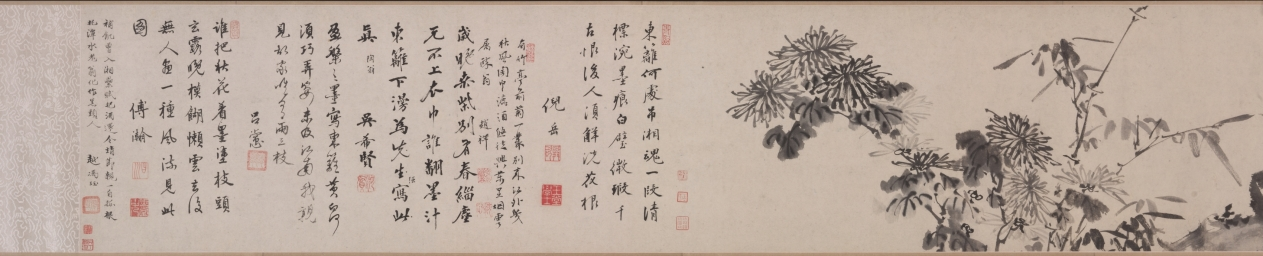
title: Chrysanthemums and Cabbage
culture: China, Ming dynasty (1368–1644)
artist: Tao Cheng (Chinese, active c. 1471–after 1502)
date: c. 1486 or before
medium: handscroll, ink and slight color on paper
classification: Painting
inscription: Artist's seal at beginning of painting: Yun hu 雲湖. Title by Wang Wenzhi 王文治 (1730–1802), date 1756. 2 seals of Wang Wenzhi 王文治 (1730-1802); 3 seals of Ku Yün (n. d.)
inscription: Section A (Chrysanthemums): 1 poem and 1 seal of Zhang Yuanzhen 張元禎 (1437–1507) - Jinshi, 1461; 1 poems and 3 seals of Ni Yue 倪岳 (1444–1501) - Jinshi, 1464; 1 poems and 2 seals of Zhao Xiang 趙祥 (life dates unknown) - Jinshi, 1469; 1 poems and 1 seals of Wu Xixian 吳希賢 (1437–1489) - Jinshi, 1464; 1 poems and 1 seals of Lü Chang 呂㦂 (1449–1511) - Juren, 1471; 1 poems and 3 seals of Fu Han 傅瀚 (1435–1502) - Jinshi, 1464; 1 poems and 1 seals of Feng Jue 馮珏 (life dates unknown) - Jinshi, 1478.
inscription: Chrysanthemums section, poem 1, by Zhang Yuanzhen 張元禎 (1437–1507): Several bushes of chrysanthemums grow in front of the Five-Willow Cottage,/ The yellow ones are really yellow and the white ones white./ This affable and decent fellow, young in years and unsophisticated,/ Has snapped one of the branches to dip in ink. (The Five-Willows Cottage was the home of the poet Tao Qian 陶潛 (Tao Yuanming 陶淵明, AD 365-427).) Chrysanthemums section, poem 2, by Ni Yue 倪岳 (1444–1501): Where at the Eastern Fence can you grieve for the Soul of the Xiang River?/ A man of upright character is mourned within the traces of ink./ White jade with a slight flaw would be a grievance forever,/ Later men should understand why even the roots of the flowers are washed. (Eastern Fence refers again to the poet Tao Qian 陶潛, while the Soul of the Hsiang River refers to the poet Qu Yuan 屈原 (c. 340–278 BC).) Chrysanthemums section, poem 3, by Zhao Xiang 趙祥 (life dates unknown): A clump of chrysanthemum grows in front of the bamboo pavilion,/ The winds of many autumns have blown since we parted beyond the river./ Straining wine through the official's cap of Tao [Qian] to prolong autumn's pleasures,/ The mists and clouds of ten thousand miles belong to the intoxicated. Chrysanthemums section, poem 4, by Wu Xixian 吳希賢 (1437–1489): It is a different spring if mulberry is planted during the latter part of the year,/ The dust of the world originally did not drop on clothing./ Who spills out ink under the Eastern Fence/ And paints so freely this portrait of chrysanthemums for the venerable Sir Tao? Chrysanthemums section, poem 5, by Lü Chang 呂㦂 (1449–1511): This full tray of ink for painting [flowers] at the Eastern Fence;/ Their whiteness or yellowness is not essential in capturing their beauty./ I don't have to go to Jiangnan to see them myself./ At my old house grow two or three branches. Chrysanthemums section, poem 6, by Fu Han 傅瀚 (1435–1502): Who daubed autumn flowers with ink/ As if they were dark dew on a branch tip only vaguely seen at evening?/ After the lazy clouds disperse, no one paints;/ A certain unconventionality pervades this painting. Chrysanthemums section, poem 7, by Feng Jue 馮珏 (life dates unknown): To satisfy his hunger, [the chrysanthemums] have at times entered the poetry of Qu Yuan;/ Taking up the wine cup, it felt close to Tao Qian./ [With them I am like] a lonely root sustained by deep water/ Or an old man to whose hair the color of youth returns.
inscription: Section B (Cabbage): 1 poem and 1 seal of Cai Qi 蔡圻 (life dates unknown) - degree information not known; 1 poems and 3 seals of Ni Yue 倪岳 (1444–1501) - Jinshi, 1464; 1 poem and 3 seals of Jiao Fang 焦芳 (1436–1517) - Jinshi, 1464; 1 poem and 3 seals of Li Dongyang 李東陽 (1447–1516) - Jinshi, 1464; 1 poems and 1 seals of Wu Xixian, signed “Xixian” 吳希賢 - Jinshi, 1464; 1 poems and 3 seals of Fu Han 傅瀚 (1435–1502) - Jinshi, 1464; 1 poems and 1 seals of Lü Chang 呂㦂 (1449–1511) - Juren, 1471; 1 poems and 2 seals of Zhao Xiang 趙祥 (life dates unknown) - Jinshi, 1469; 1 poems and 1 seals of Feng Jue 馮珏 (life dates unknown) - Jinshi, 1478.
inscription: Cabbage section, poem 1, by Cai Qi 蔡圻 (life dates unknown): The ink splashes are fresh from a frosty brush dipped in pond water;/ I can visualize that time when Yunhu 雲湖 [Tao Cheng] first showed his talents./ I lament the places where I scribbled before,/ Who would open them to inscribe a poem? (The first line is an allusion to the famous Jin dynasty calligrapher Wang Xizhi 王羲之 (AD 303-361), who practiced calligraphy so diligently at the edge of a pond that the water turned black with ink.) Cabbage section, poem 2, by Ni Yue 倪岳 (1444–1501): After rain the vegetables begin to grow;/ How are the colors of the masses lately!/ Once you get used to them, the tastiest parts are the ends of the roots;/ I don't know if they can be used for "seasoning soup." ("Seasoning soup" is an allusion to the statesmanship of a chief minister.) Cabbage section, poem 3, by Jiao Fang 焦芳 (1436–1517): This crop of purple stalks and green leaves is late and irregular;/ Now the rainy season is over for the Eastern Garden./ All the nobles nowadays dine on meat;/ Who of them knows the flavor of this [cabbage]. Cabbage section, poem 4, by Li Dongyang 李東陽 (1447–1516): It's always helped the honest man to sober up after drinks./ I intend to go to the deepest part of the stream-crossed garden/ To refresh myself in the fragrance and dew of evening. Cabbage section, poem 5, by Wu Xixian 吳希賢 (1437–1489): After rain, the white silk is filled with fragrant vegetables;/ How many times this happens in Mr. Tao's paintings./ On whom will you depend to present a memorial to the ruler?/ Don't let this color emerge on the faces of the people. (The last line is meant as a warning to officials: the color of the vegetables (green) may be pleasing in itself, but when it emerges on the faces of the starving poor, it signifies a badly governed world.) Cabbage section, poem 6, by Fu Han 傅瀚 (1435–1502): For twenty years I have feasted on the excellent mutton of an official;/ Yet I talk and dream about the garden and its vegetables./ Do not merely say it is good to chew the root of the cabbage--/ You must taste to understand what poverty is. Cabbage section, poem 7, by Lu Chang 呂㦂 (1449–1511): The capital is never a place for an apprentice in the "garden of scholarship."/ Who would write about gardens and vegetables on an examination paper?/ I've walked throughout the country in spring;/ Make sure the people don't show this color. Cabbage section, poem 8, by Zhao Xiang 趙祥 (life dates unknown): After a wash of rain, the spring garden is still in order;/ The flavor [of the cabbage] is more suitable with a small drink and the hum of a tune./ The rich and powerful in their mansions consume dish after dish of meat;/ Vegetarian food is known only by the scholars. Cabbage section, poem 9, by Feng Jue 馮珏 (life dates unknown): A new cabbage is nourished with dew;/ It takes a long time to grow and mature./ The business of "seasoning the soup" is your responsibility;/ Better command the gardener to take care [of the cabbages]. trans. HK/LYSL/WKH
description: On an autumn day in Beijing, Tao Cheng had a gathering with a group of scholar-officials and created two paintings in a spontaneous, casual style. The first depicts chrysanthemums, slender bamboo stalks, and a rock in monochrome ink. Tao applied light colors for the second painting that depicts cabbage. Tao deliberately placed the images on the first sections of the paper so that his honorable guests could add their poetic inscriptions inspired by his imagery. In the first section to the right, all seven poetic inscriptions refer to the beloved poet and recluse Tao Qian (also called Tao Yuanming, AD 365–427) who was particularly known for his profound love for chrysanthemum flowers. Most of the inscriptions in the second section express sympathy for the poor, since cabbage is the main ingredient in their humble food. Taken together, the poems and paintings allude to the life and responsibilities of the scholar-official: the importance of both an upright character and a concern for the poor citizens in order to achieve good government.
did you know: Eminent calligrapher Wang Wenzhi 王文治 was only 27 sui when he wrote the title in 1756.